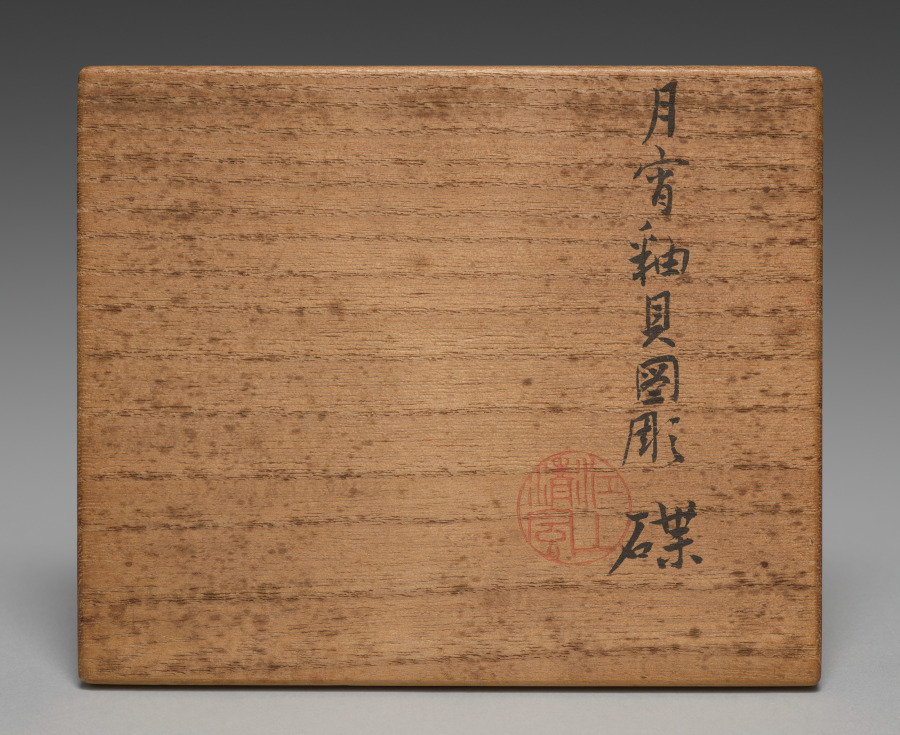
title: Dishes with Shells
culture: Japan, Taishō period (1912–26)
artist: Seifū Yohei IV (Japanese, 1872–1951)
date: 1914–46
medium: Set of five dishes; porcelain with blue glaze, iron oxide, and molded design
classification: Ceramic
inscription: 清風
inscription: 清風造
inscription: 清風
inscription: 成山清風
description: Yohei IV chose an aquatic theme for this set of five mukōzuke, side dishes. He added an iron oxide rim and used a concentrated blue glaze on both the interior and exterior. The glaze, named on the box lid, is his father’s “evening moon” (tsukiyoi) color. The conch in relief takes up the entire bottom of the dish. Up the sides are two snails on one end and on the other a scallop. This results in a boldly graphic, less realistic effect.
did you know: This set of dishes, mukōzuke, could be used for serving small side dishes at a tea gathering.